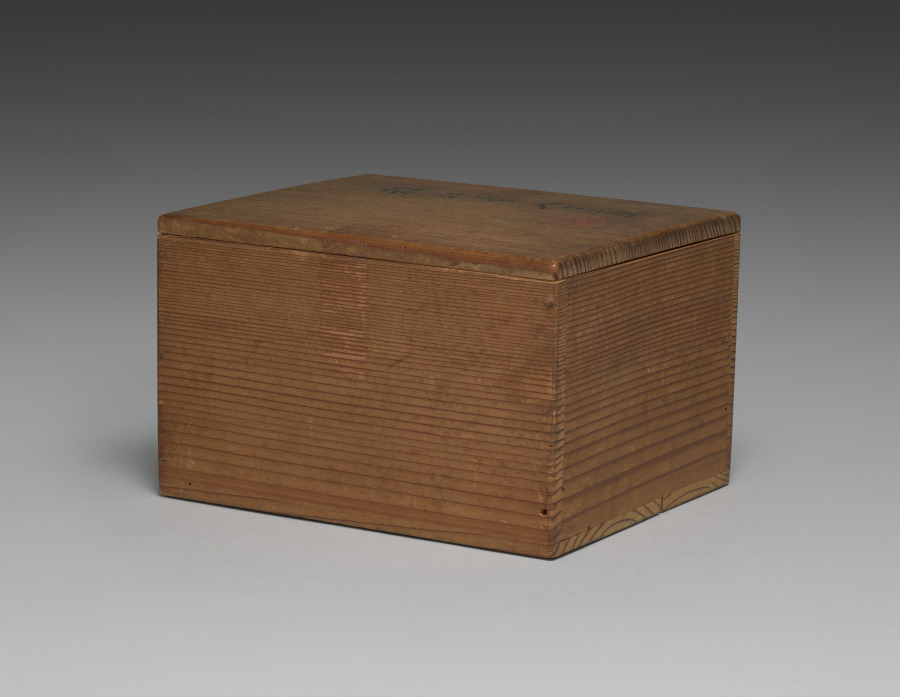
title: Nesting Dishes with Scattered Pine Needles and Maple Leaves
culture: Japan, Edo period (1615–1868)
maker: Seifū Yohei I (Japanese, 1801–1861)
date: 1861–78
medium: Pair of dishes; stoneware with underglaze blue, iron oxide, slip, and crackled glaze, and overglaze color enamel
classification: Ceramic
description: Seifū Yohei I made both blue and white porcelains after Ming dynasty (1368–1644) Chinese wares fired in the kilns at Jingdezhen for export. He also made colorful stoneware in the style of his teacher, Nin’ami Dōhachi (Takahashi Dōhachi II) (1783–1855).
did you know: The combination of the blue and brown for the needles imparts a sense of depth to the design, with the blue needles apparently at a greater distance.